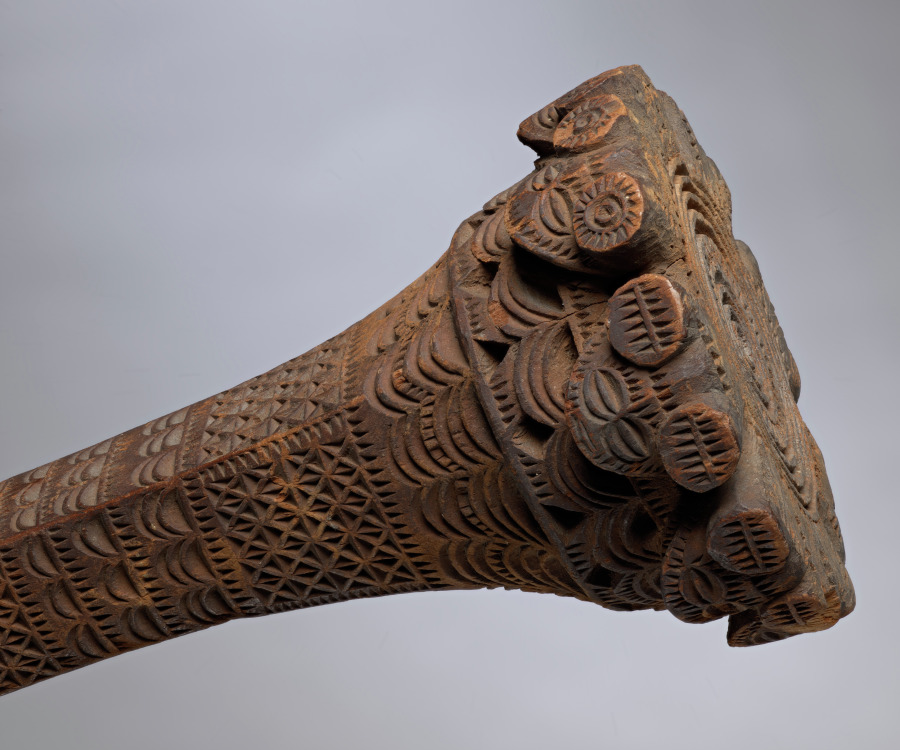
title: Ceremonial Paddle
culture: Polynesia, Ra'ivavae, Austral Islands, 19th century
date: 1800s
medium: wood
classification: Sculpture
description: Fine, chip-carved patterns cover the blades and shafts of Austral Islands ceremonial paddles. Squatting human figures carved around the butt are called tiki tiki tangata, meaning man-gods. The shafts of early paddles are usually round in cross-section; 19th-century examples are sometimes square. The function of the intricately carved Austral Islands paddles is uncertain. They may have been displayed on ceremonial occasions, such as dances, pageants, ancestral rituals, or inaugurations.